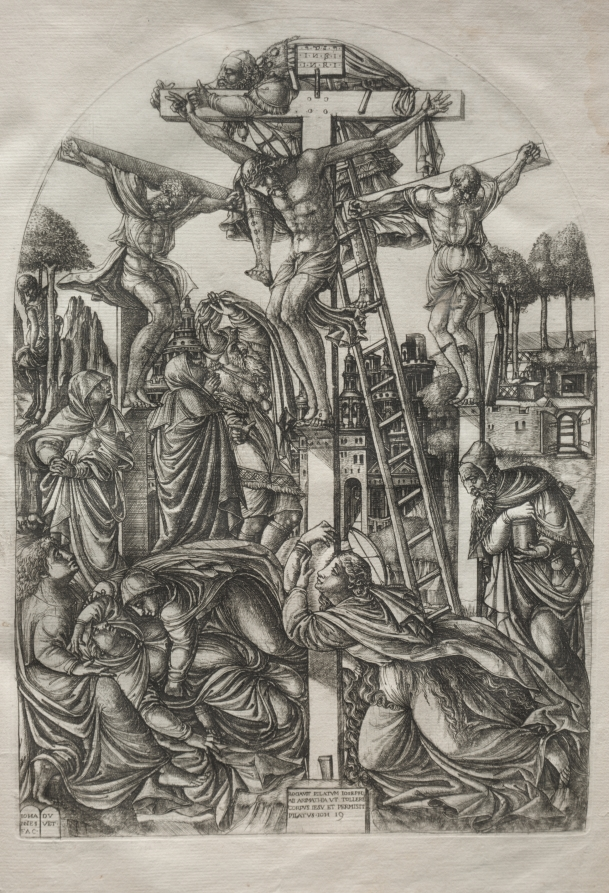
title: Christ on the Cross between the Two Thieves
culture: France, 16th century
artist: Jean Duvet (French, 1485–1561)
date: before 1561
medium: engraving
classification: Print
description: This print is part of a bound volume of works illustrating the a narrative of the Apocalypse, taken from the Revelation of Saint John in the Bible. The 23 engravings in the series occupied the artist for a number of years and represent his greatest artistic achievement. The museum's volume is one of only seven known complete sets. Jean Duvet was one of the first major printmakers in France and one of the most original artists of the 1500s. Although he worked mostly in the provincial city of Langres, he became aware of Italian art through the circulation of prints—notably those of Marcantonio Raimondi. His solidly modeled human figures reflect the influence of the Italian High Renaissance. Duvet, however, developed an idiosyncratic, highly artificial style with crowded compositions that ignore rational space in favor of ornamental surface patterns.